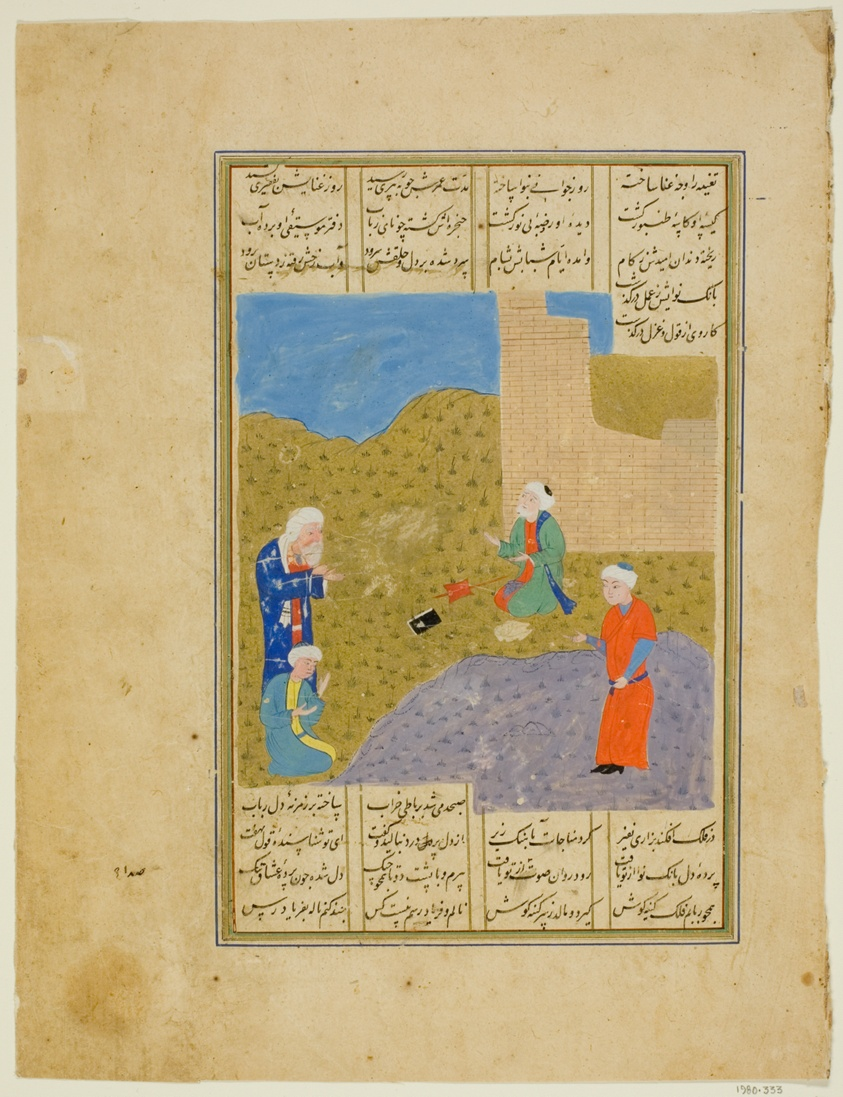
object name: Painting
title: Old Man Attended by Visitors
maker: Uzbekistan; Bukhara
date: 16th Century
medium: Opaque watercolor and gold on paper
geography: Bukhara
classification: miniature painting; painting; asian art